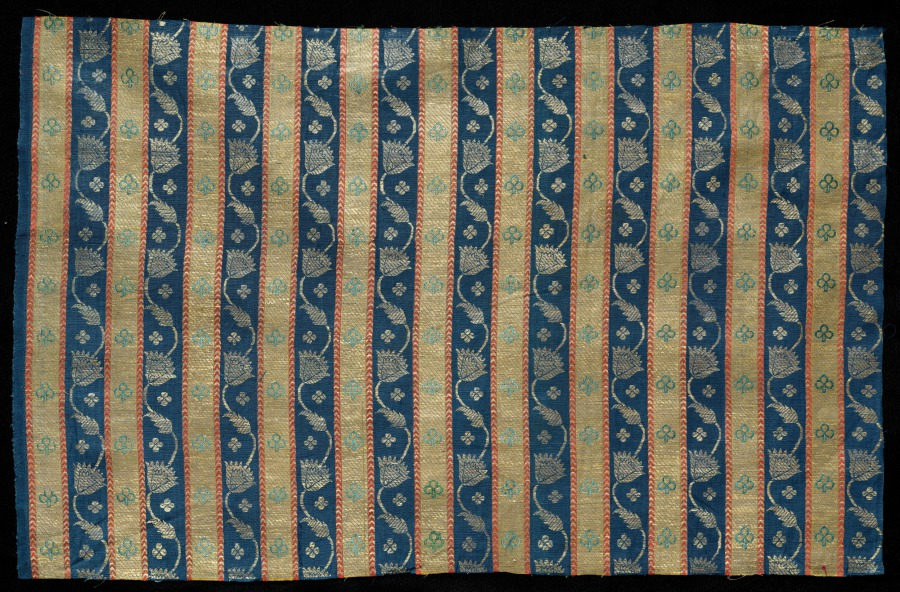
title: Striped Brocade with Flowering Vine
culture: Western India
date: 1700s–1800s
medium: Cotton and silk: brocade, “kimkhwab”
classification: Textile